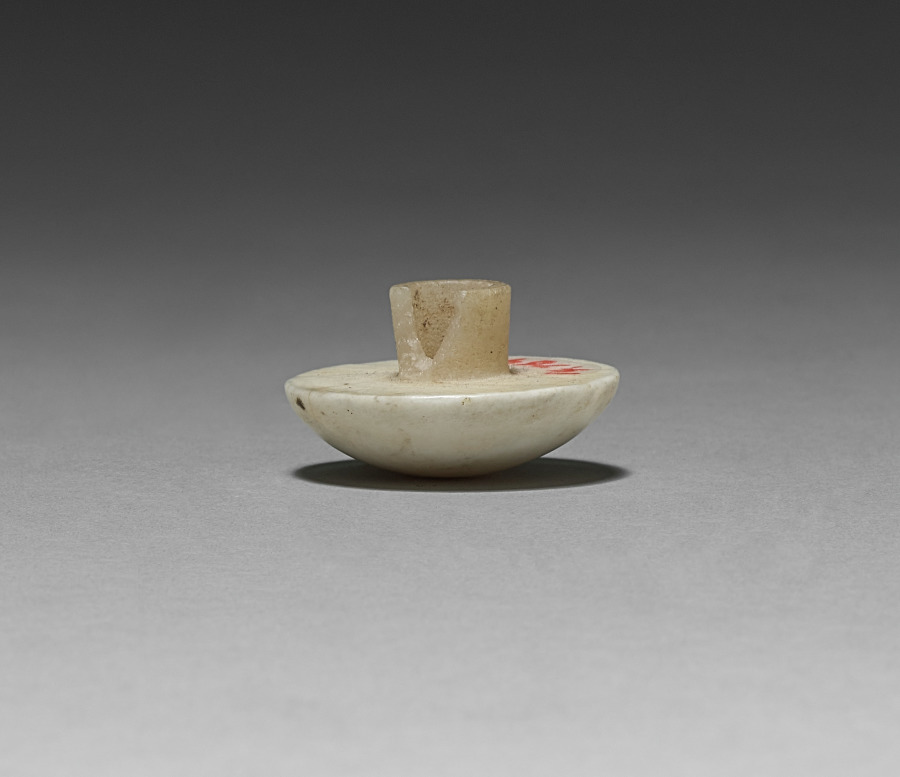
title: Ear Stud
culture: Egypt, New Kingdom (1540–1069 BCE), Dynasty 18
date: 1540–1296 BCE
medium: travertine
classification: Jewelry